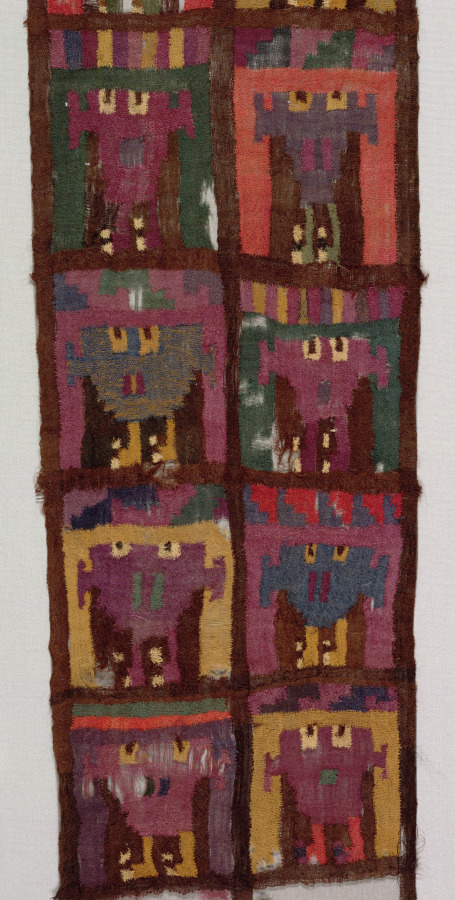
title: Band with Trophy Heads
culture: Peru, South Coast, Nasca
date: 100 BCE–700 CE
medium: interlocking warp and weft, single interlock: wool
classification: Textile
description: This band, remarkable for its intense color and spider-web sheerness, was created using an unusual technique known as discontinuous warp and weft. That is, none of the vertical or horizontal yarns are continuous from one side of the band to the other. Rather, they travel back and forth within their own color areas, linking at the edges with yarns in adjacent areas. This is a difficult feat when weaving on a loom and the creator likely used another approach, such as darning with a needle over a ground cloth that was then removed. The image repeated in each of the band’s rectangles is a head supported on two little feet.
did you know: This band is made in with a weaving technique that is unique to the ancient Andes.